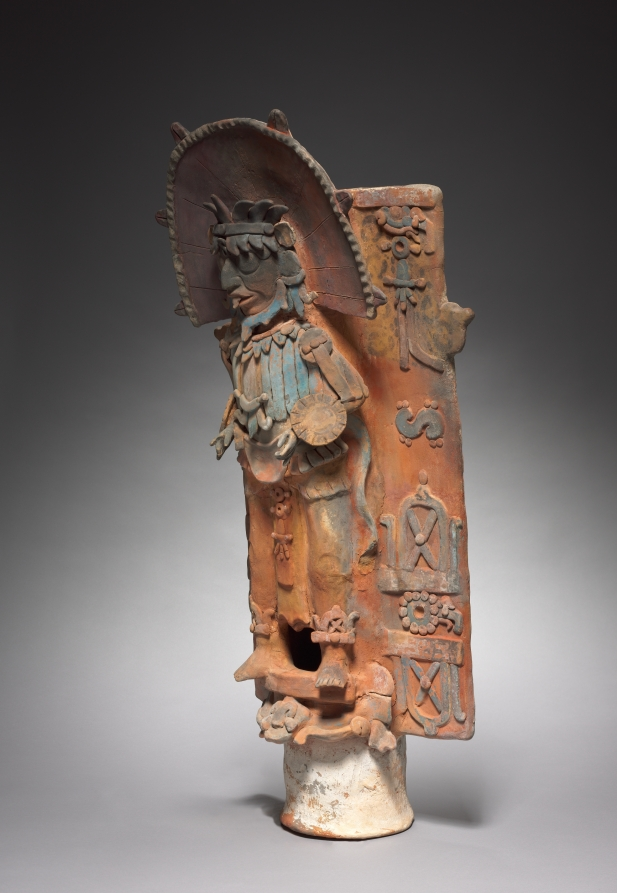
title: Incensario (Incense Burner) Support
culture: Mesoamerica, Maya, Palenque region, Classic Period (250-900) or modern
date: 600–900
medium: earthenware with pigments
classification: Sculpture